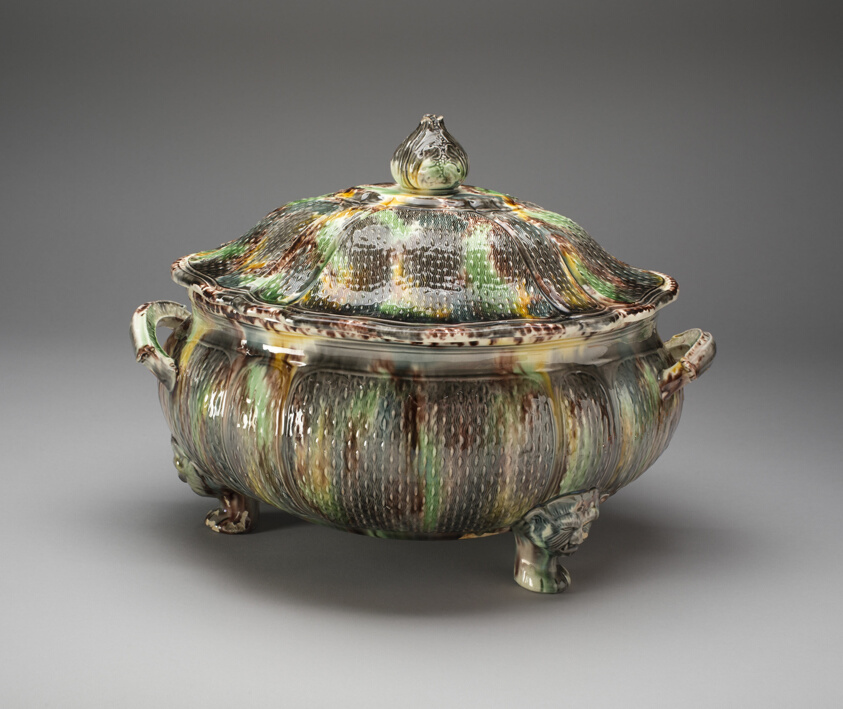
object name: Ceramics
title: Tureen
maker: England, Staffordshire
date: 1750–65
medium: Lead-glazed earthenware (creamware)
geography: Staffordshire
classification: earthenware; lead-glazed earthenware; european decorative arts; ceramics